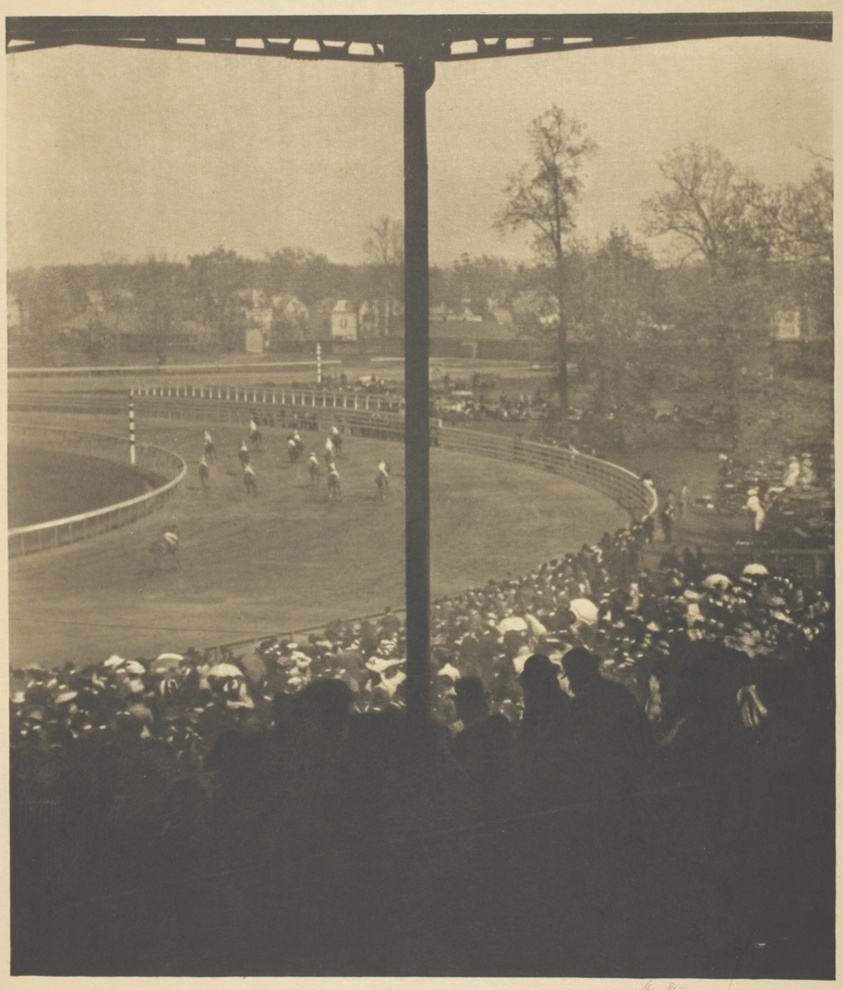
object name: Photograph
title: Going to the Post, Morris Park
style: Pictorialism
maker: Alfred Stieglitz (American, 1864–1946)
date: 1904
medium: Photogravure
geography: United States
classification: photogravure; photomechanical process; photography; photograph